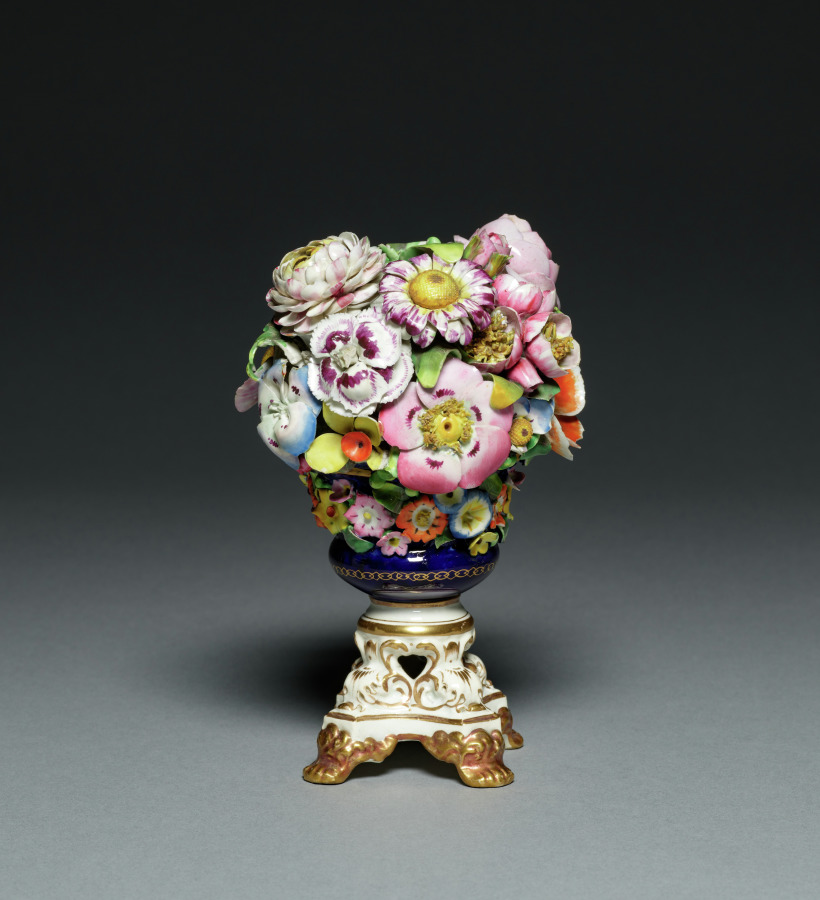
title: Flower Pot and Flowers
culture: England, Derby, 19th century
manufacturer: Derby Porcelain Factory (Bloor Period) (British)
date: 1811–1848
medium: artificial porcelain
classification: Ceramic